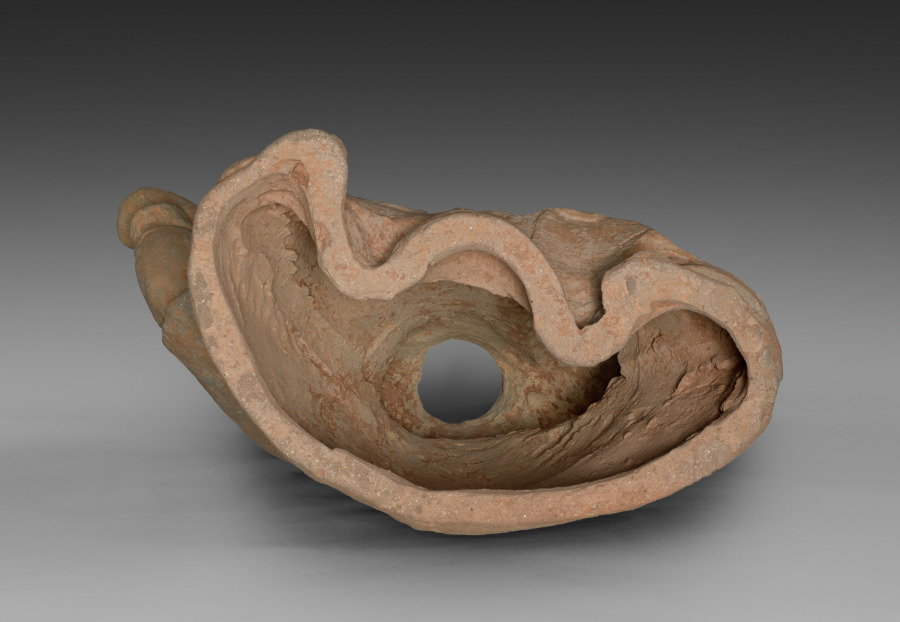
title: Female Figure of a Court Entertainer Dancing (Body)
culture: China, Sichuan province, Eastern Han dynasty (25–220 CE)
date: 100s CE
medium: Pottery with traces of color pigment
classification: Ceramic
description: During the Han era, tombs of the elite were provided with sculpted renditions of their earthly entourage, such as guardians or musicians, to signify their status in the afterlife. The female dancer with elaborate hairdo held by flower ornaments raises one arm holding her wide sleeve with one hand, while the other lifts her robe to reveal what appears to be a drum underneath her garment, her face smiling, all in a gesture of an entertainer.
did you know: The dancer lifts her robe to reveal what appears to be a drum underneath her garment.